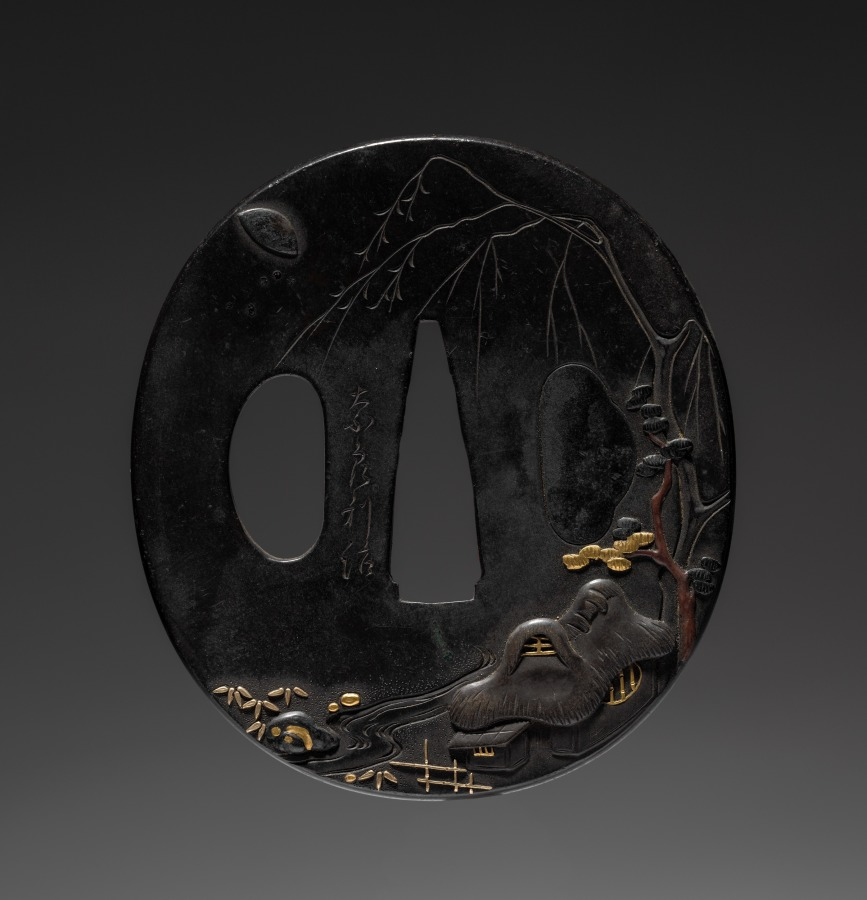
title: Sword Guard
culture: Japan, Edo period (1615–1868)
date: late 1600s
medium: iron (Nara type)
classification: Arms and Armor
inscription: signed "Nara Toshiharu."